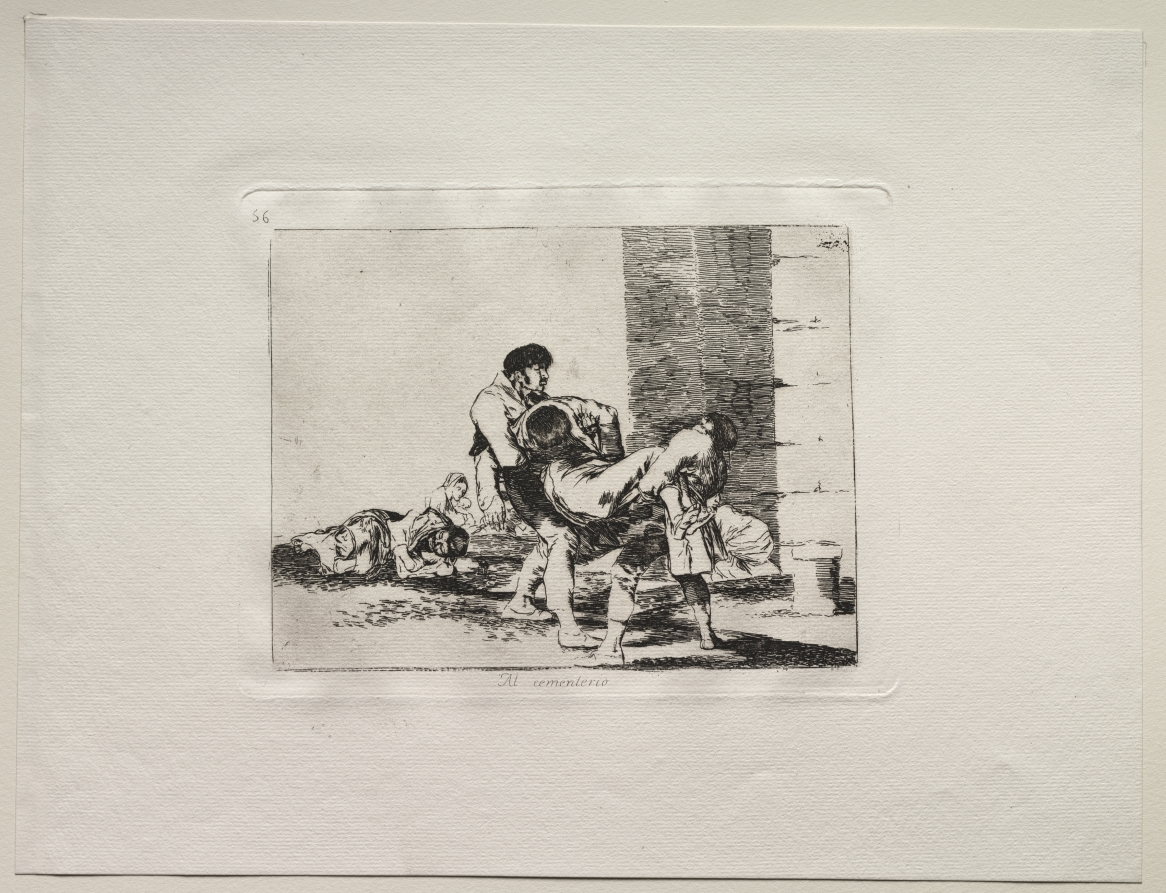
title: The Horrors of War: To The Cemetery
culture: Spain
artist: Francisco de Goya (Spanish, 1746–1828)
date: c. 1810–20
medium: etching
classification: Print